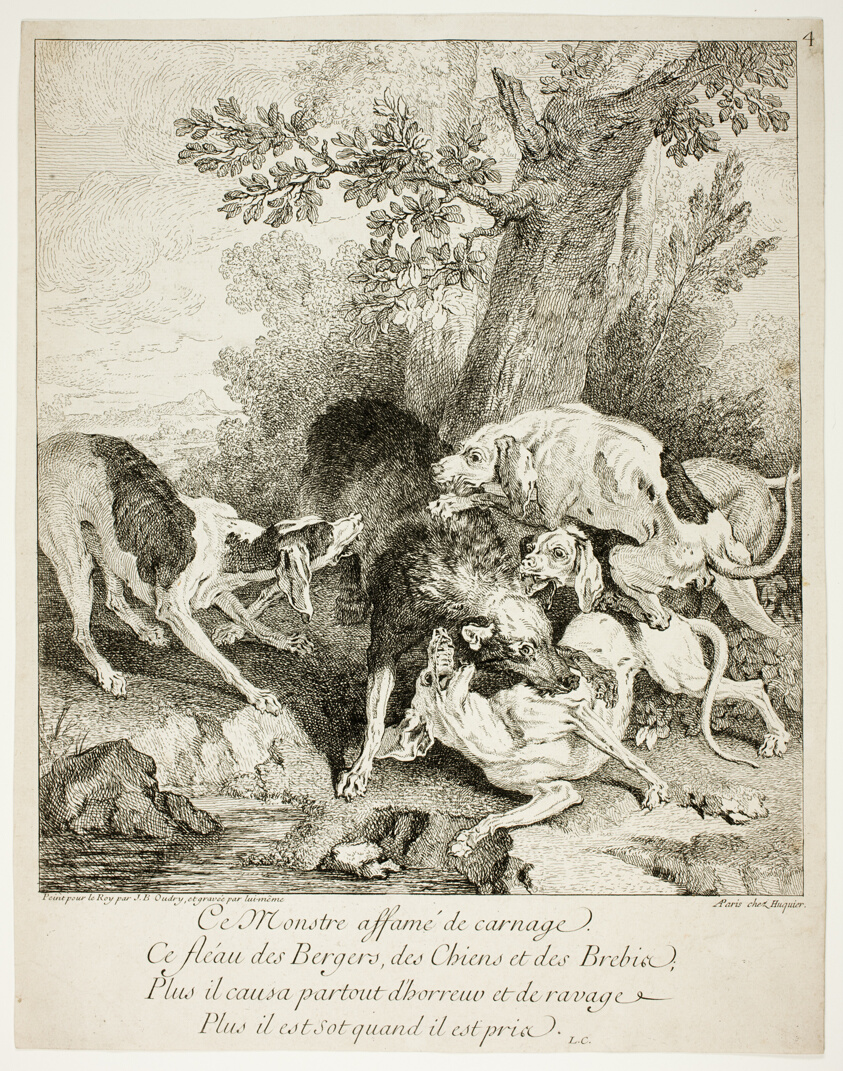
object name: Print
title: The Wolf at Bay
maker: Jean-Baptiste Oudry (French, 1686-1755)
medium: Etching on ivory laid paper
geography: France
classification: etching; print; prints and drawing